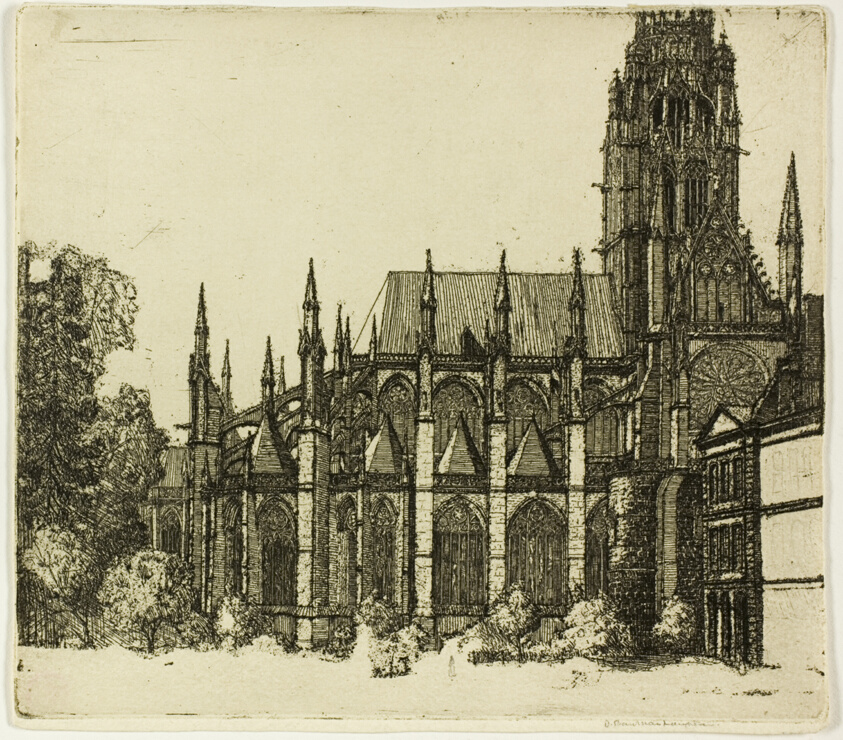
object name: Print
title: St. Ouen, Rouen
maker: Donald Shaw MacLaughlan (American, born Canada, 1876-1938)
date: 1903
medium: Etching in black on cream laid paper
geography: United States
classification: etching; print; prints and drawing